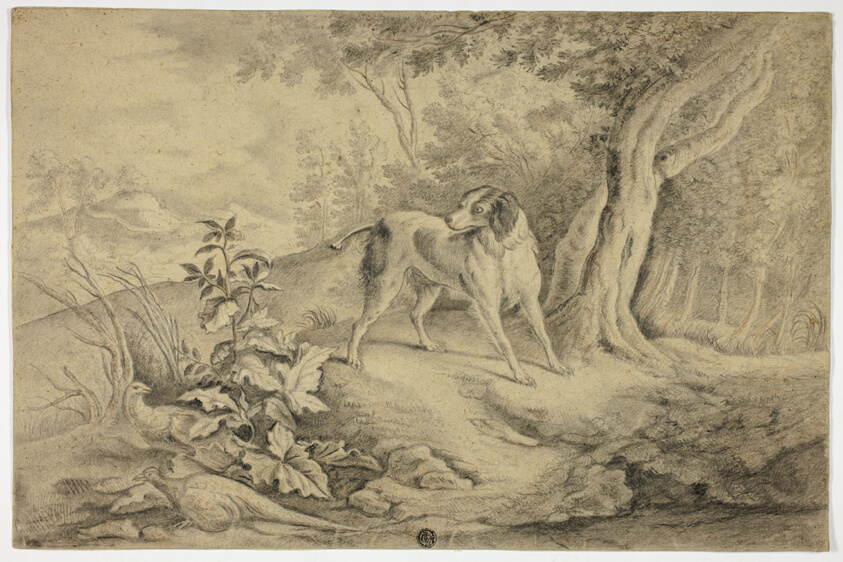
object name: Drawing and Watercolor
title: Hunting Dog in Woods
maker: Attributed to James Barenger, the younger; English, 1780-after 1831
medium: Black crayon with red chalk on tan laid paper, laid down on cream laid paper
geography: England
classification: crayon; drawings (visual works); prints and drawing